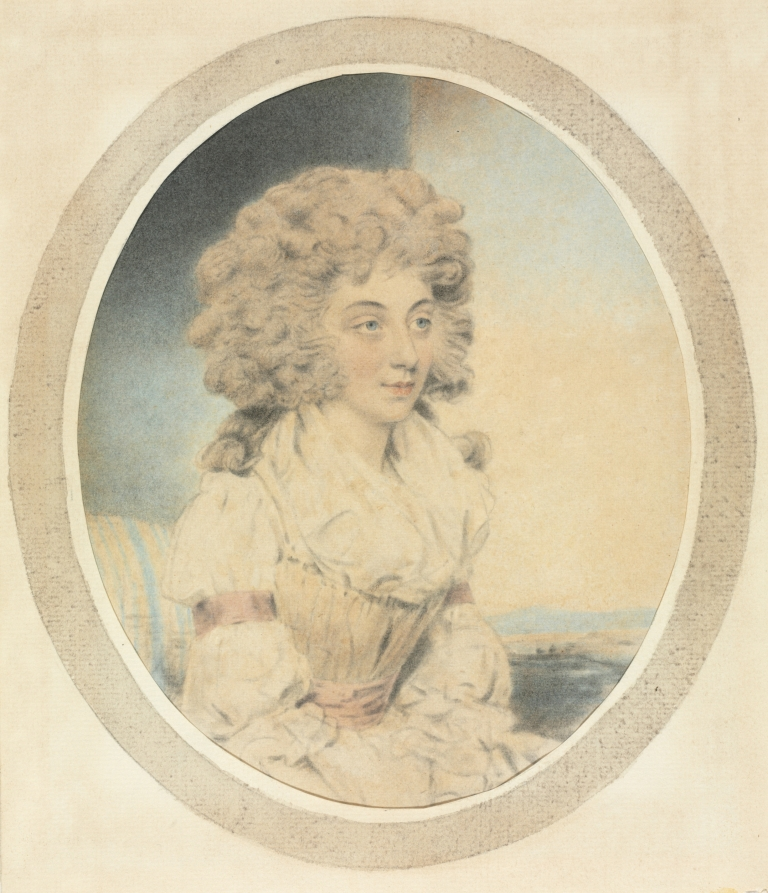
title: Seated Young Lady Facing Right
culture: England, 18th century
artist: John Downman (British, 1750–1824)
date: c. 1770–1824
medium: brush and black chalk wash and watercolor with traces of black crayon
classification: Drawing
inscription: VERSO OF STRETCHER, upper center, in graphite: [? 156?, partially masked] ; upper right, in graphite: C.E.F.